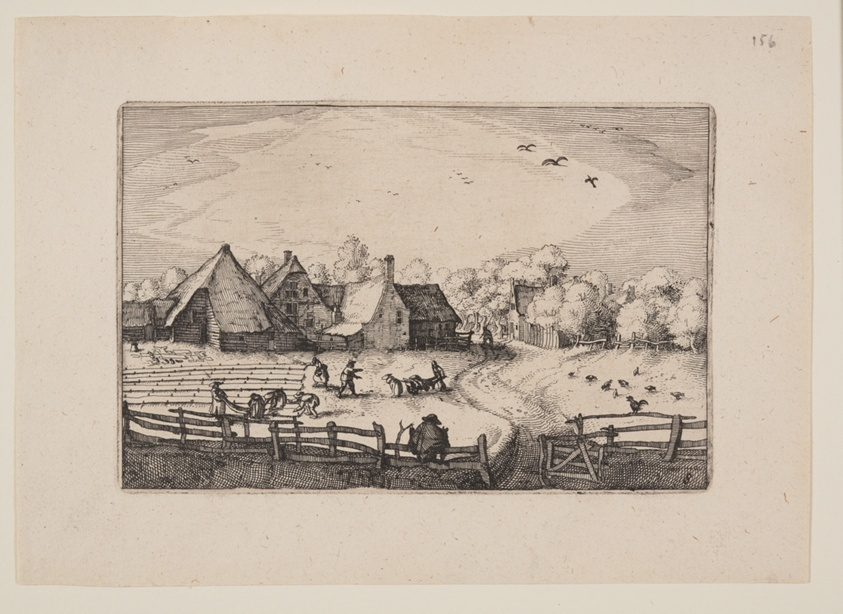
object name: Print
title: Bleaching-Fields Near the Haarlemmer Hout, from Views in the Surroundings of Haarlem (Plaisante Plaetsen)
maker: Claes Jansz. Visscher (Netherlandish, c. 1550–c. 1612)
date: 1610/20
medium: Etching on ivory laid paper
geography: Netherlands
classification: print; paper; prints and drawing; etching